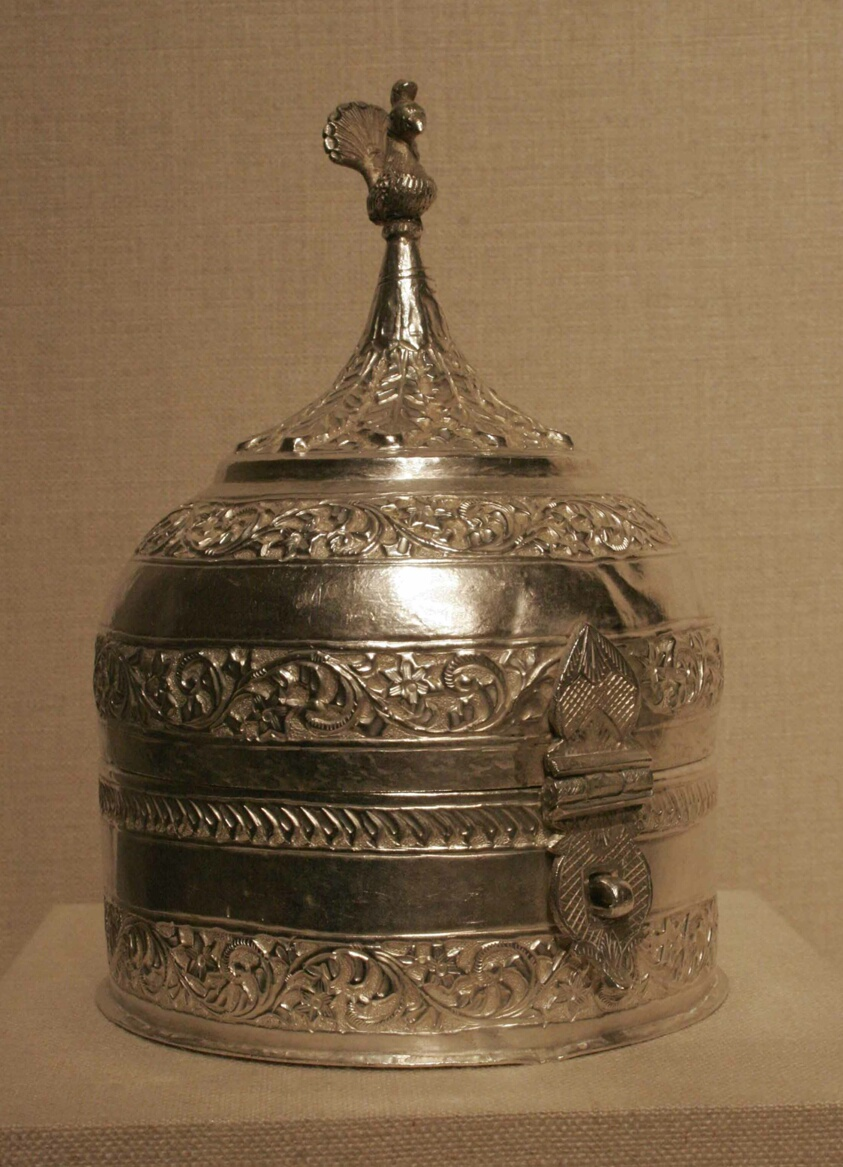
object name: Decorative Arts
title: Betel-Leaf Container (Pandan)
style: South Asian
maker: India; Possibly Uttar Pradesh/Avadh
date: 19th century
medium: Silver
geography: India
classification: silver; metal; container; asian art; decorative arts